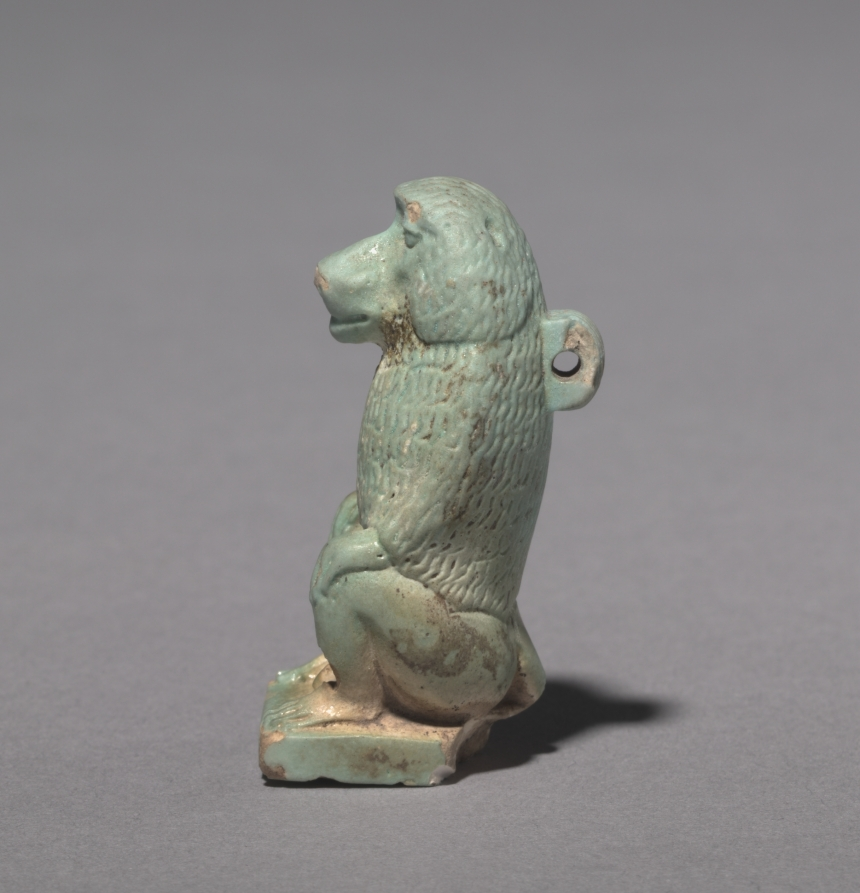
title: Thoth as Baboon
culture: Egypt, Late period (715–332 BCE), Dynasty 26–Greco-Roman period (332 BCE–395 CE), Ptolemaic dynasty (305–30 BCE)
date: 664–305 BCE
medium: pale turquoise faience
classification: Amulets